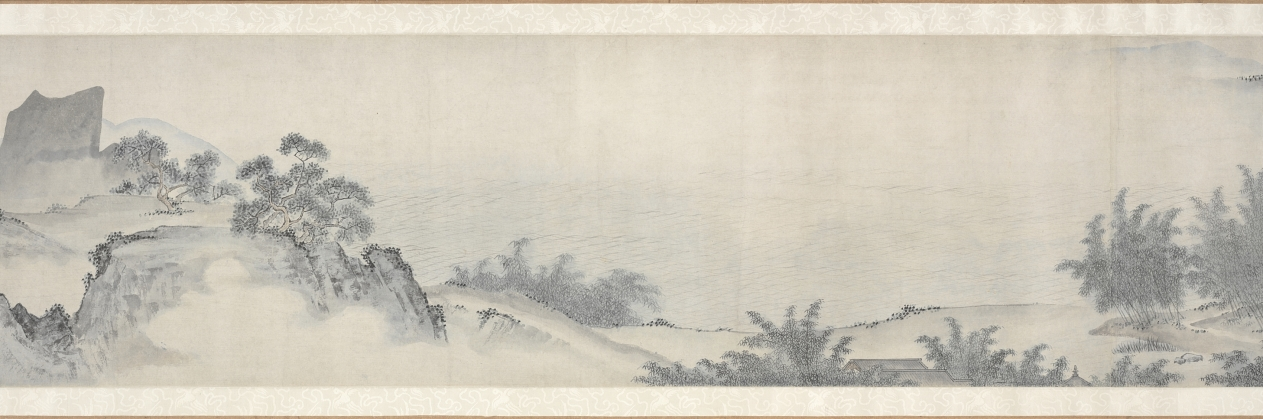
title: Ten Thousand Li of the Yangzi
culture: China, Ming dynasty (1368–1644)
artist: Dai Jin (Chinese, 1388–1462)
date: c. 1400s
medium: Handscroll; ink and color on paper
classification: Painting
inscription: Two colophons at end. Artist's seals: Dai Jin 戴進 and Wenjin 文進.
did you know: Dai Jin is traditionally considered the founder of the Zhe School, a style of landscape painting.